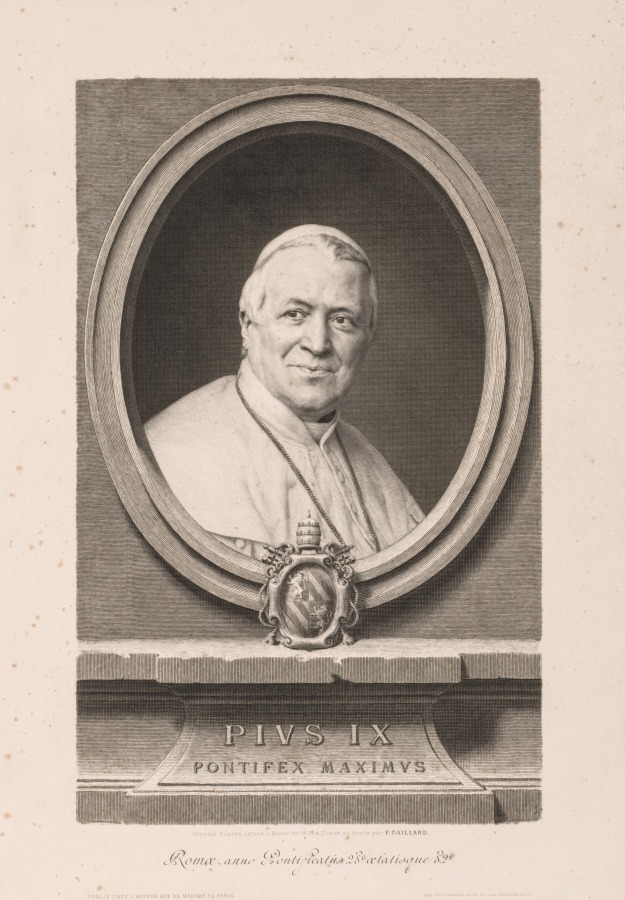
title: Pius IX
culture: France, 19th century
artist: Claude-Ferdinand Gaillard (French, 1834–1887)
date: 1873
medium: engraving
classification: Print